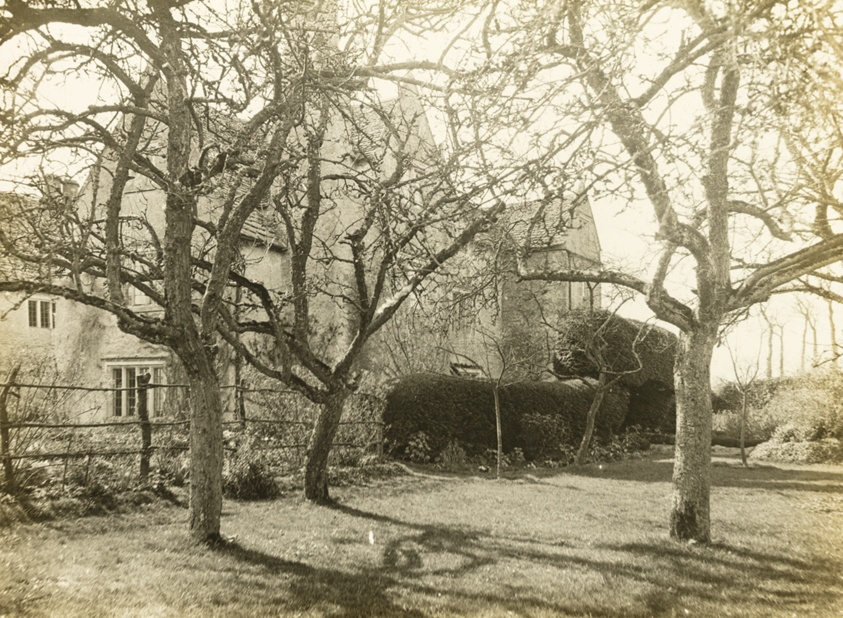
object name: Photograph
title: Kelmscott Manor: From the Orchard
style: Pictorialism, 19th century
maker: Frederick H. Evans (English, 1853–1943)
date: 1896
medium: Lantern slide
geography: England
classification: photograph; photography